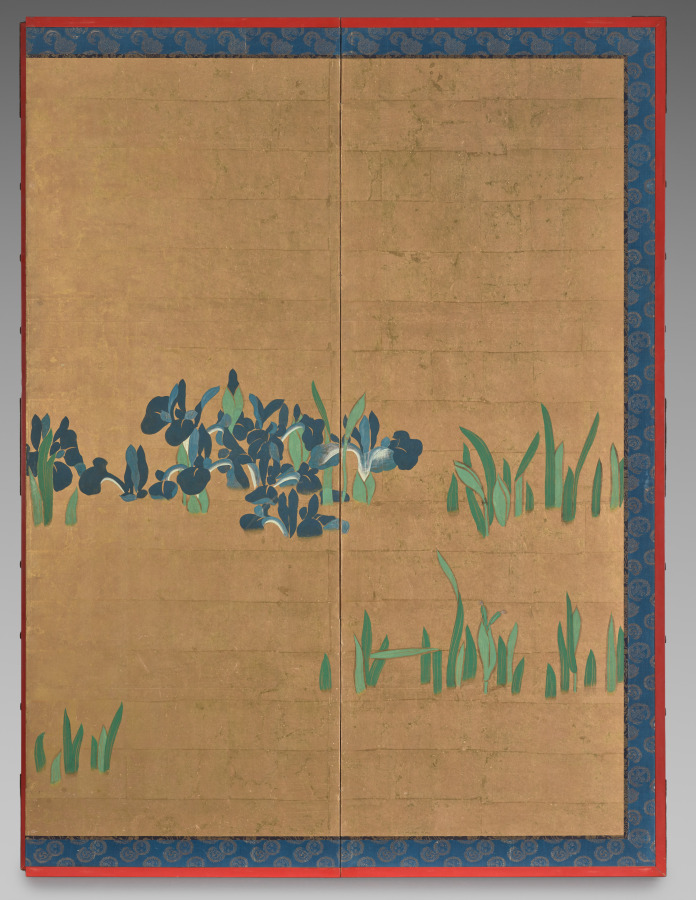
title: Irises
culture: Japan, Edo period (1615–1868)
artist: Watanabe Shikō (Japanese, 1683–1755)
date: 1700s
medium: One of a pair of six-panel folding screens, ink and color on gilded paper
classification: Painting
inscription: signed and sealed lower right of the first panel from the right.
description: The subject of this painting comes from a 10th-century text. It tells of a young nobleman’s journey into the lonely countryside, far from the capital city of Heian-kyō (Kyoto). There he came upon a small stream, the banks of which were covered with blooming irises, on which the artist has chosen to focus our attention. While viewing the beautiful flowers the nobleman composed a poem: I have a beloved wife, Familiar as the skirt of a well-worn robe, And so this distant journeying Fills my heart with grief.